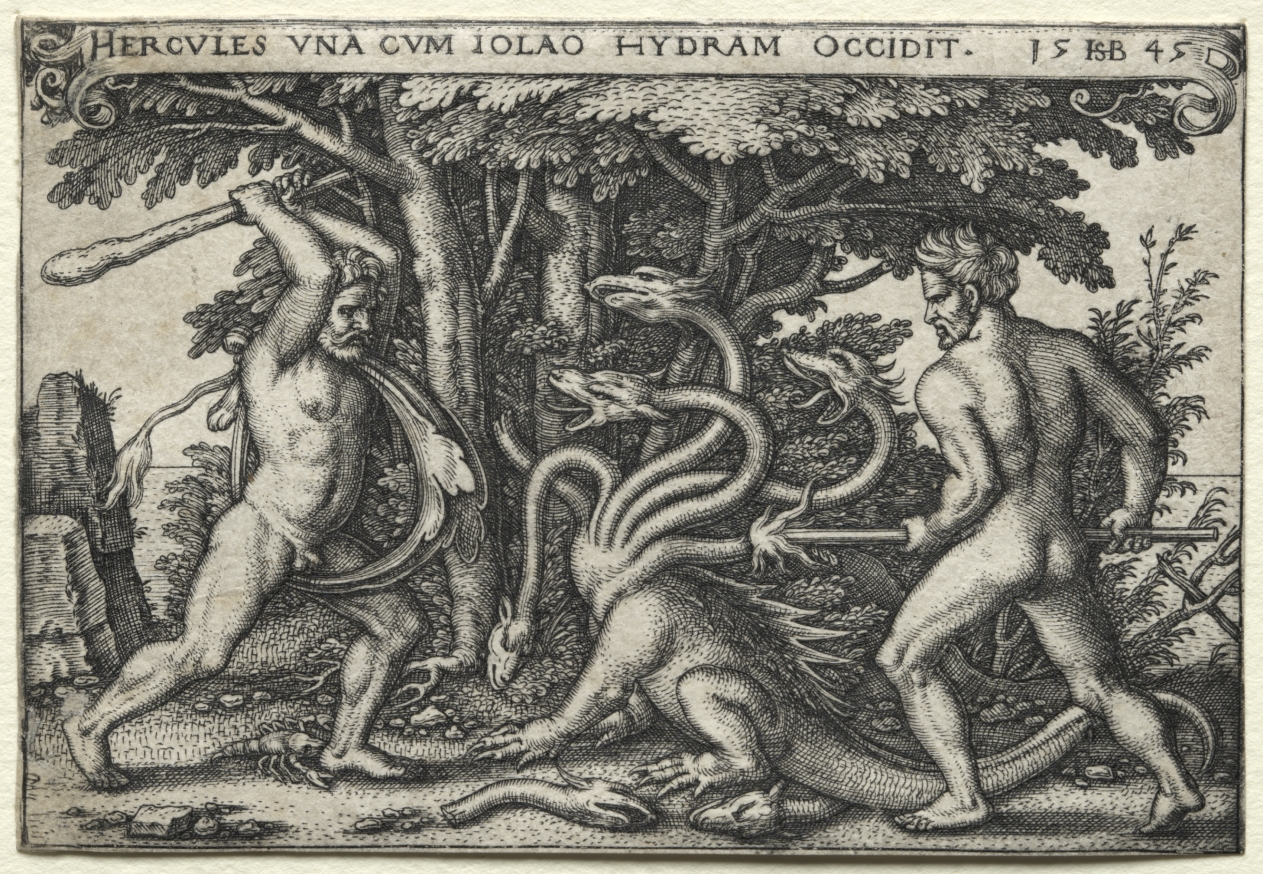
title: The Labors of Hercules: Hercules Killing the Lernean Hydra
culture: Germany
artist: Hans Sebald Beham (German, 1500–1550)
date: 1545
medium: engraving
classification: Print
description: Beham was one of several German printmakers referred to today as the “Little Masters.” They established their artistic prowess by engraving remarkably small prints, appealing to collectors fascinated with miniature objects and curiosities. Here, Beham has packed 12 larger-than-life stories of the mighty Hercules into tiny prints. The series includes three of the 12 labors Hercules performed as penance for slaying his children in a fit of madness: Strangling the Nemean Lion, Killing the Lernean Hydra, and Dragging Cerberus from the Underworld. The other scenes depict tales from his life and the events preceding his death. The son of Jupiter and the mortal Alcmena, Hercules was both man and god. His saga of moral and physical trials made him one of the most popular classical heroes in Renaissance art.